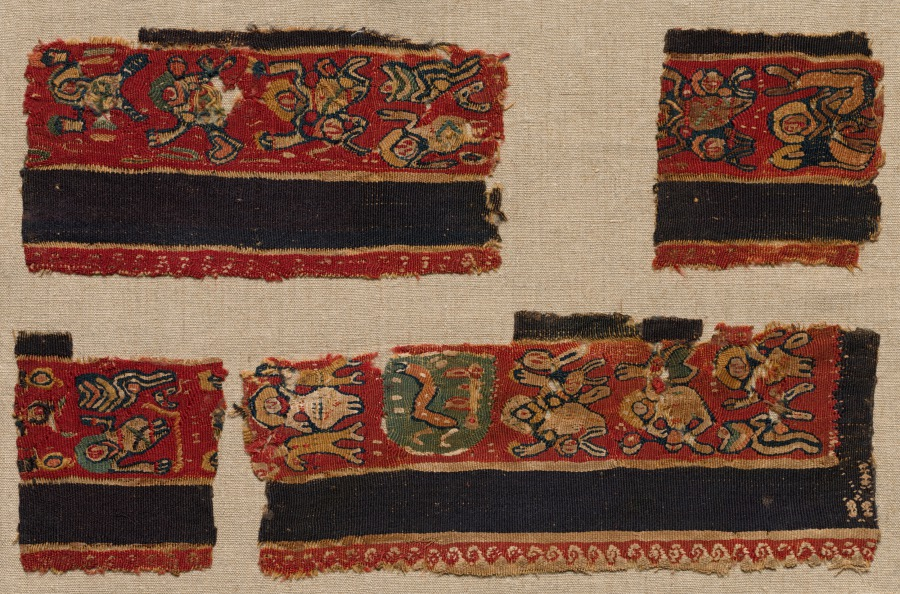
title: Four Fragments of the Clavi of a Tunic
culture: Egypt, Byzantine period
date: 400s - 600s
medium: tabby weave with inwoven tapestry ornament, linen and wool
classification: Textile